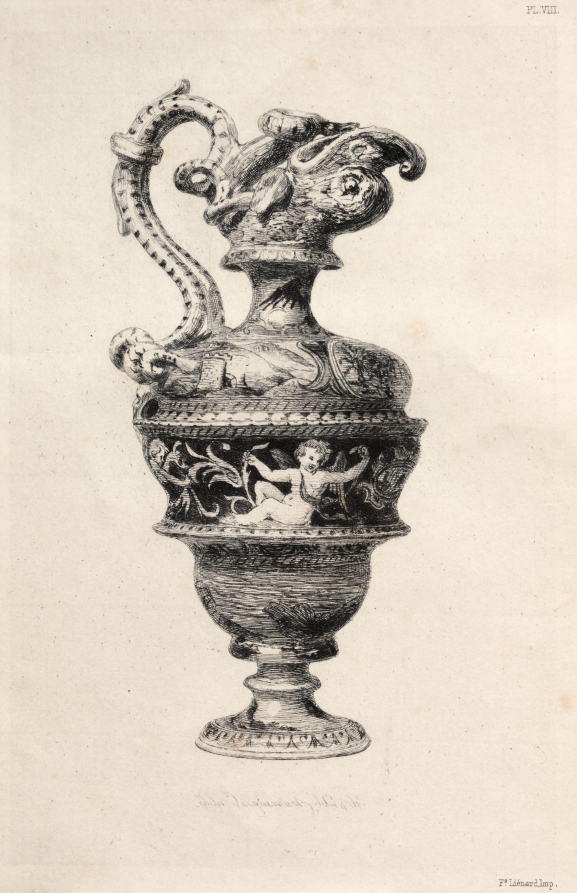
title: History of the Ceramic Art: A Descriptive and Philosophical Study of the Pottery of All Ages and All Nations: China: Green Family- Vase, "Lancelle" Form, Historic Subject (Plate I)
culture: France, 19th century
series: Book by Albert Jacquemart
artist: Jules Jacquemart (French, 1837–1880)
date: 1877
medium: etching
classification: Bound Volume